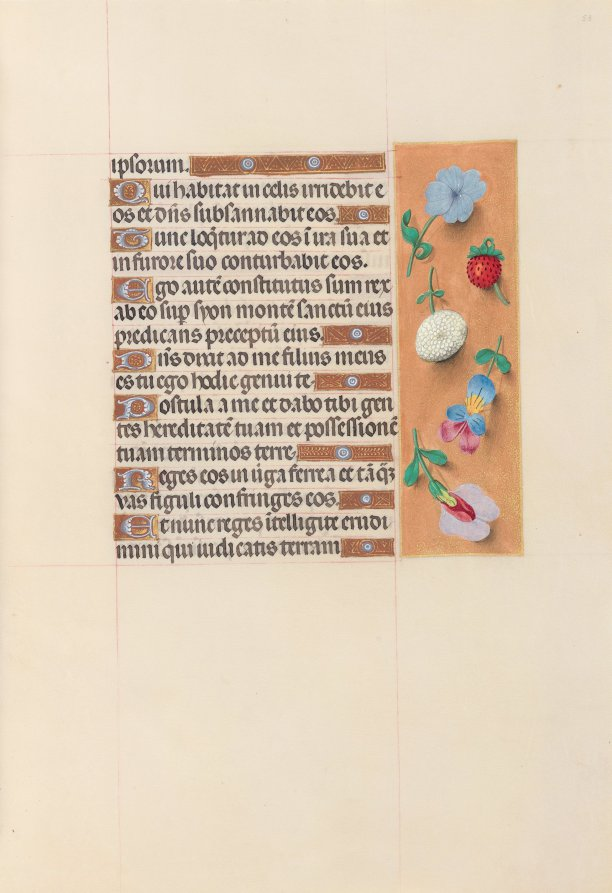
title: Hours of Queen Isabella the Catholic, Queen of Spain: Fol. 53r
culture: Flanders, Ghent and Bruges, late 15th century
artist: Master of the First Prayerbook of Maximillian (Flemish, c. 1444–1519)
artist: and Associates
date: c. 1500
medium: ink, tempera, and gold on vellum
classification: Bound Volume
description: This manuscript was illuminated by a circle of at least five highly organized manuscript painters active in the Flemish cities of Ghent and Bruges. The principal illuminator was Alexander Bening, who painted the majority of the book's miniatures. Manuscripts produced by this circle of artists are renowned for the decoration of their borders, which typically feature a rich variety of realistically-painted flowers, birds, and butterflies. This prayer book, called a book of hours, was intended not for a cleric, but for the private devotions of a lay person-in this case, Isabella the Catholic, Queen of Spain (1451-1504). Isabella's coat of arms embellishes the book's frontispiece. It is unlikely that the book was commissioned by the Queen herself; rather, she probably received it as a diplomatic gift from someone courting her patronage, perhaps Cardinal Francisco Jimenez de Cisneros. A Franciscan friar, Jimenez was dependent upon Isabella for his advancement, first to the post of Queen's confessor in 1492, and then to Archbishop of Toledo in 1495.